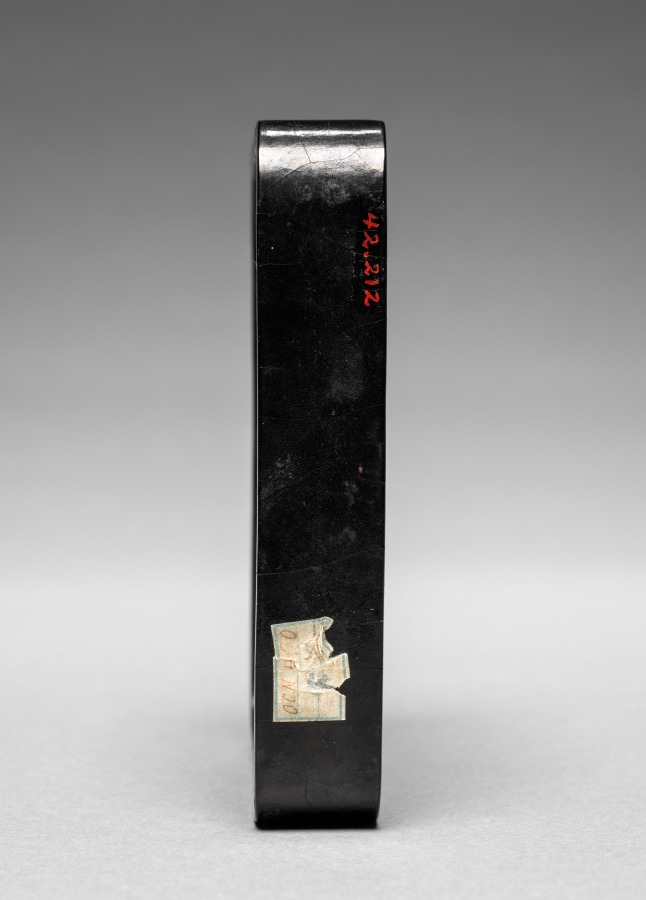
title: Ink Cake with Architectural Design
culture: China, Qing dynasty (1644-1911), Qianlong inscription, mark, and reign (1736-95)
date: 1736–95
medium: molded ink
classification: Miscellaneous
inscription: 大清乾隆年制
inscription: 待月樓珍藏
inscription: 御墨. 光分太乙. 吟詠春風里.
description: In China, access to political power was granted to those who passed the civil service examinations, a system that offered official service only at a high level of education. Chinese literati-officials, whose daily routine involved administrative work in an office, enjoyed precious objects on their writing desks that offered distraction and demonstrated good taste. By the Ming (1368–1644) and Qing (1644–1911) dynasties, these utensils of the literati studio also became collectibles and were treasured as artworks.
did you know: To make liquid ink, an ink cake is ground against an inkstone with a small quantity of water.